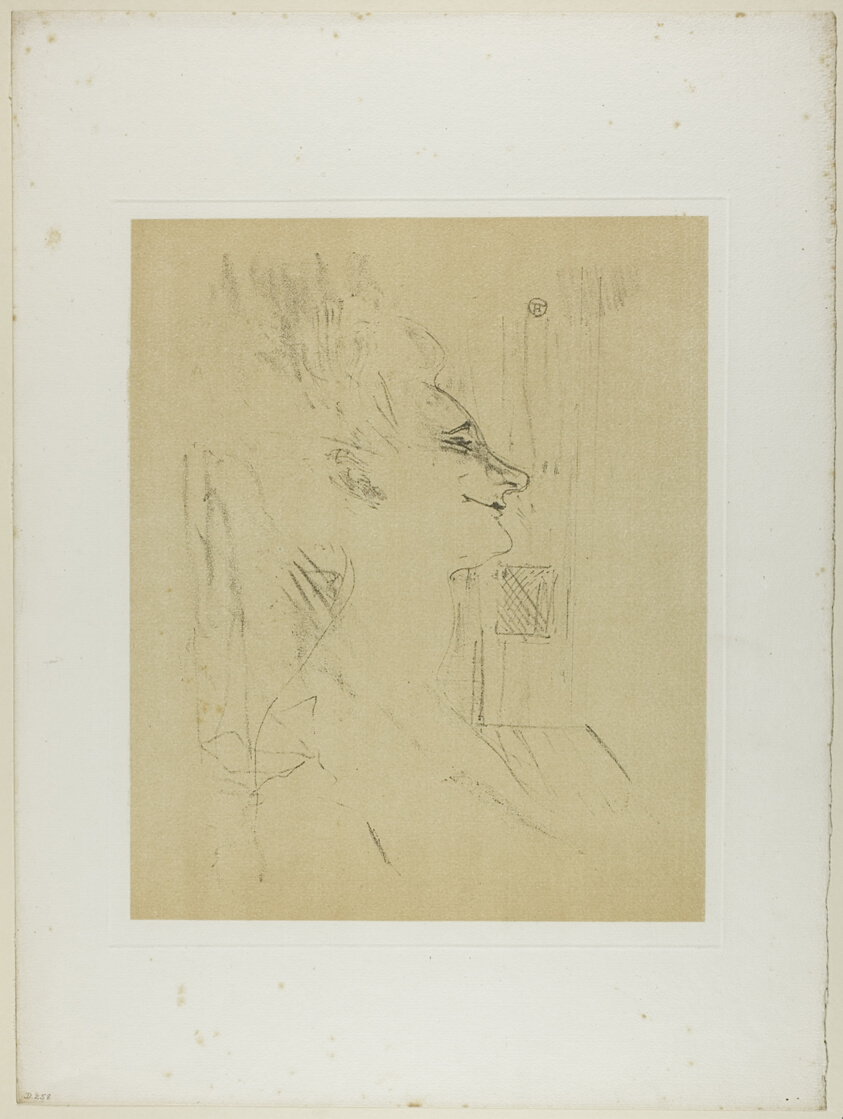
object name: Print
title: Yvette Guilbert—Soûlarde, from Yvette Guilbert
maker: Henri de Toulouse-Lautrec (French, 1864-1901)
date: 1898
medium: Lithograph with beige tint stone, on ivory laid paper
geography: France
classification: lithograph; print; prints and drawing